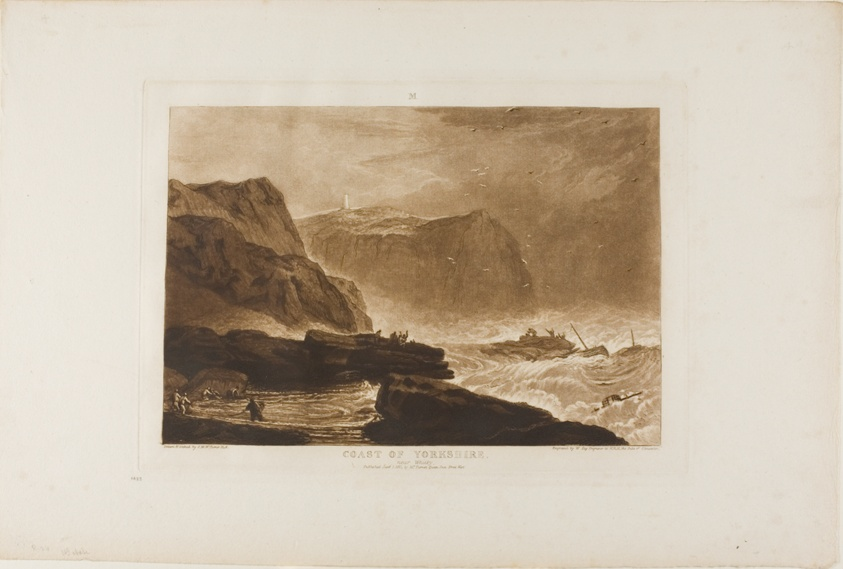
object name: Print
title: Coast of Yorkshire, plate 24 from Liber Stuidorum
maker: Joseph Mallord William Turner (English, 1775-1851); Engraved by William Say (English, 1768-1834)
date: published January 1, 1811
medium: Etching and engraving in brown ink on ivory wove paper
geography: England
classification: etching; print; prints and drawing